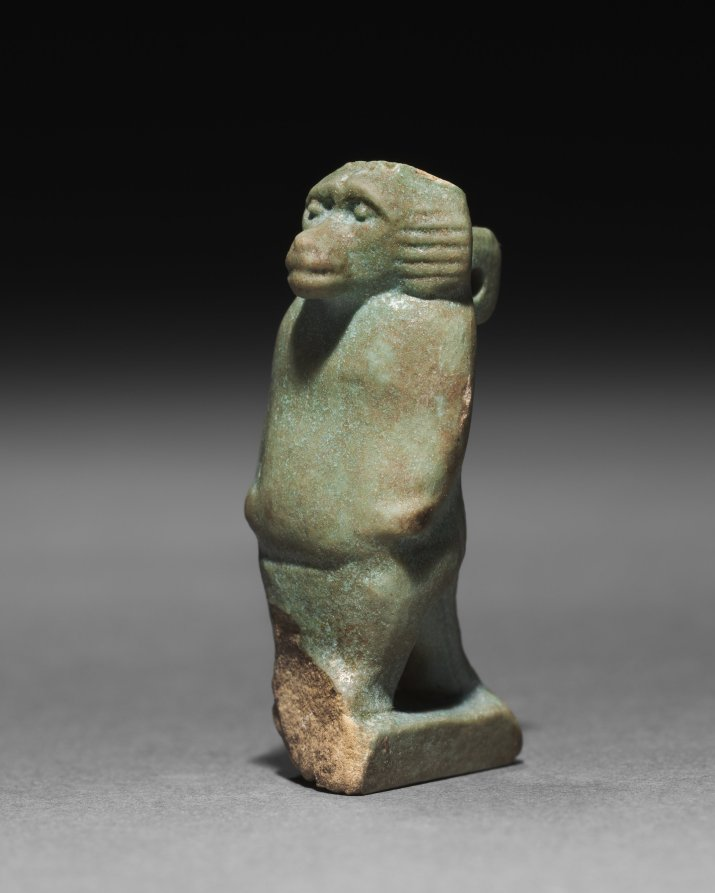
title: Baboon-Falcon Hybrid Amulet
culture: Egypt, Late period (715–332 BCE)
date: 715–332 BCE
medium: pale robin's egg blue faience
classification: Amulets